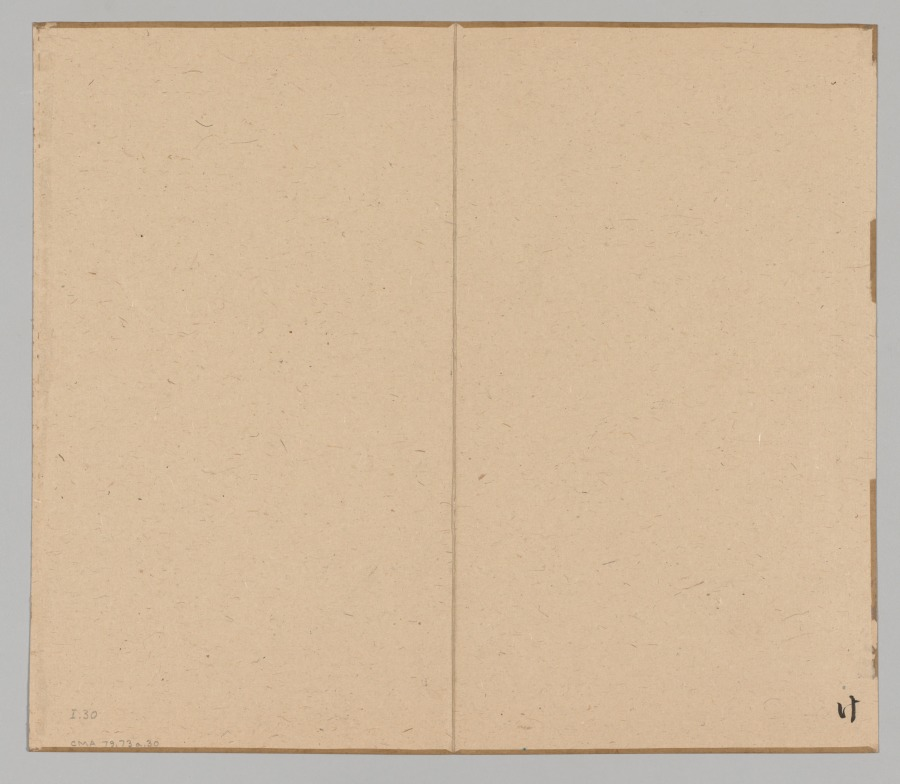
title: Reverberations of Taiga, Volume 1 (leaf 30)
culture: Japan, Edo period (1615–1868)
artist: Aoki Shukuya (Japanese, d. 1802)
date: mid- to late 1700s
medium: double-leaf from a pair of albums; ink and light color on paper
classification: Portfolio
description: Traditionally, young painters in Japan began their studies with an established master-painter. The master's compositions invariably became models that the apprentice copied to learn various ink and brush techniques. Shukuya was a pupil of the famous Kyoto artist Ikeno Taiga, whose style is reflected in these sketches of rocks, trees, and mountains.